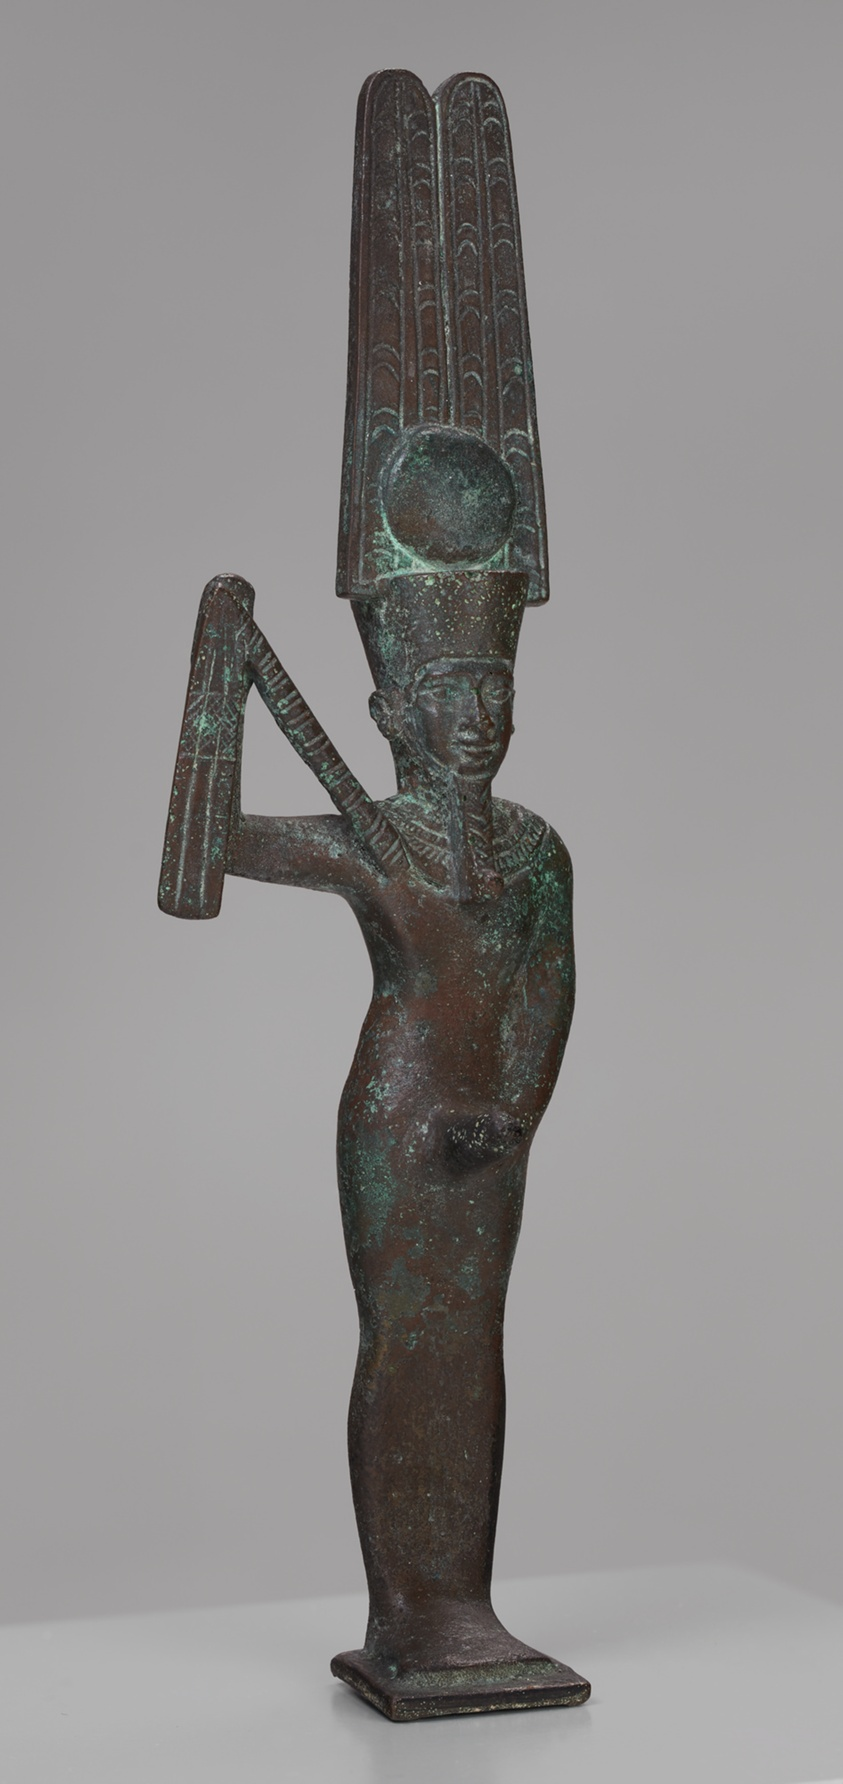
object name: Sculpture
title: Statuette of the God Min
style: late period (egyptian), egyptian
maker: Egyptian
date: Late Period, Dynasties 26–31 (664–332 BCE)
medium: Copper alloy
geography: Egypt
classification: statuette; bronze; metal; sculpture; ancient art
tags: gods (deities)